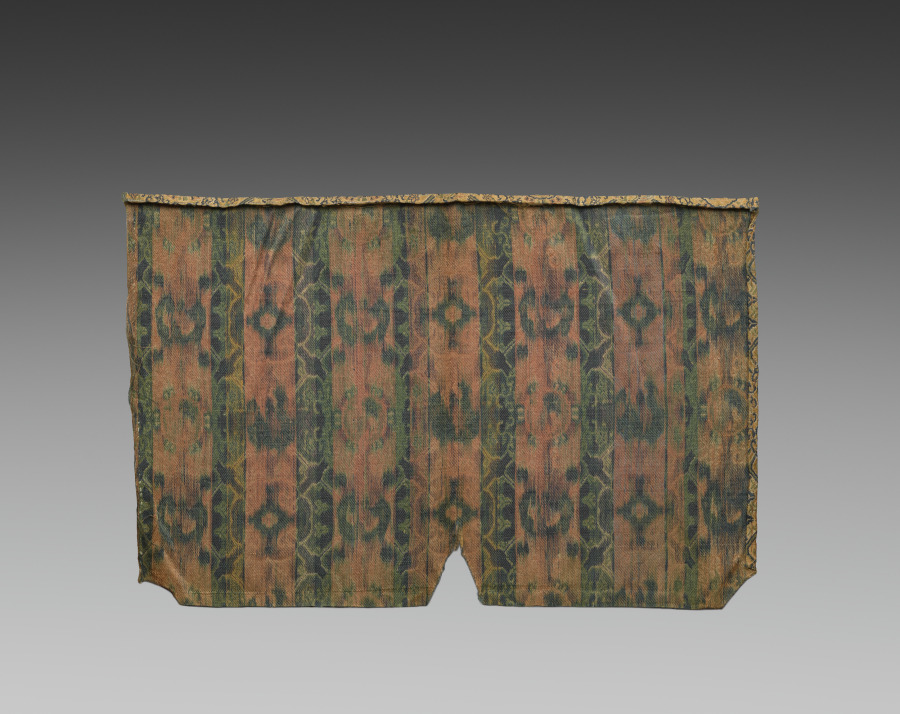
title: Fragment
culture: China, Qing dynasty (1644-1911)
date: 1800s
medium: silk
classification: Textile